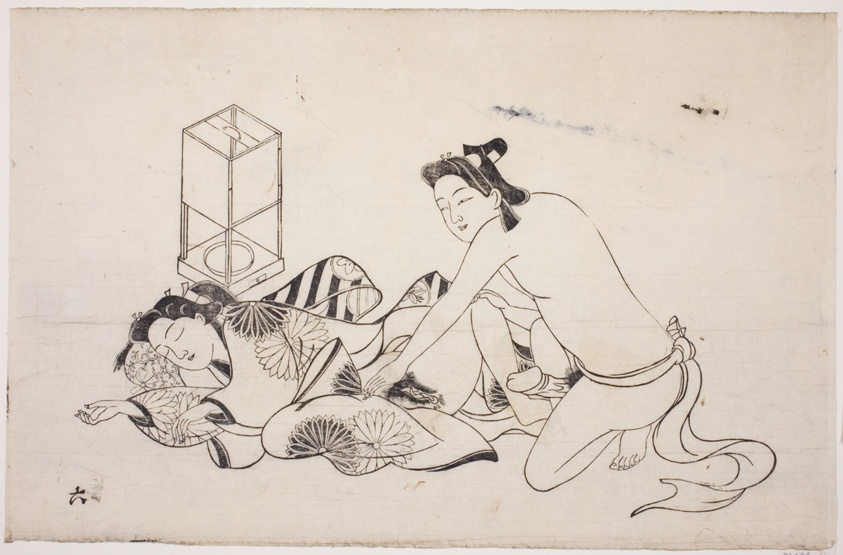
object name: Print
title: A sheet from a shunga album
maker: Japanese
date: 1679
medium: Woodblock print; sumizuri-e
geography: Japan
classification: print